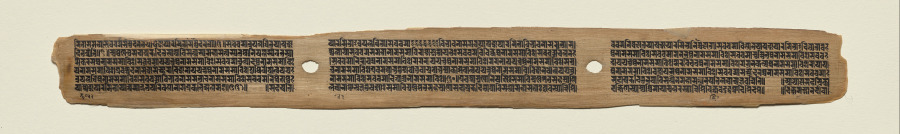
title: Text, folio 186 (recto), from a Manuscript of the Perfection of Wisdom in Eight Thousand Lines (Ashtasahasrika Prajnaparamita-sutra)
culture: Eastern India, Bihar, Vikramashila Monastery. Painting: Nepal, Kathmandu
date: Sunday, September 14, 1119 (year 239 of the Newar Samvat in the month of Ashvina)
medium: Gum tempera and ink on palm leaf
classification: Painting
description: This manuscript, consisting of 188 double-sided folios, was calligraphed by a scribe at a monastery in northeastern India, commissioned by a monk from Nepal. Judging from the style of the paintings, they are the work of Nepalese artists.